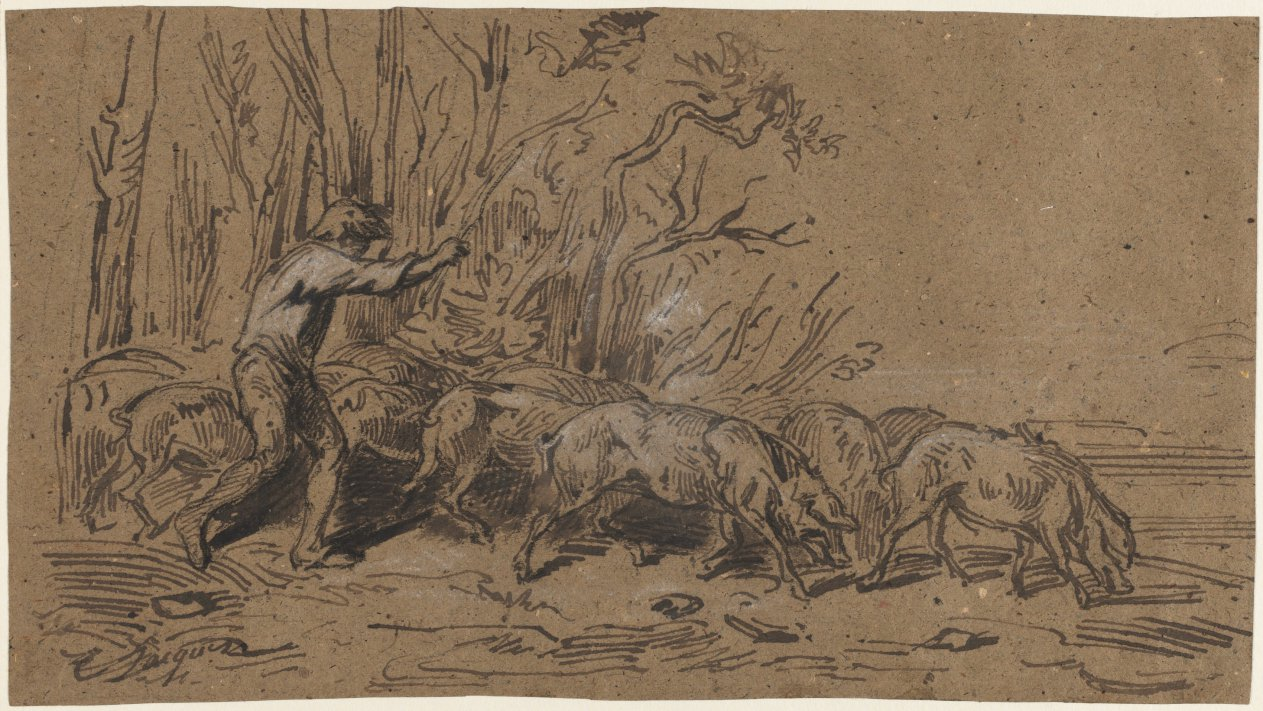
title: The Truffle Gatherers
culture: France, 19th century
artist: Charles-Émile Jacque (French, 1813–1894)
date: c. 1849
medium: brown ink heightened with black and white chalk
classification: Drawing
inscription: Signed, lower left in brown ink: C. Jacque